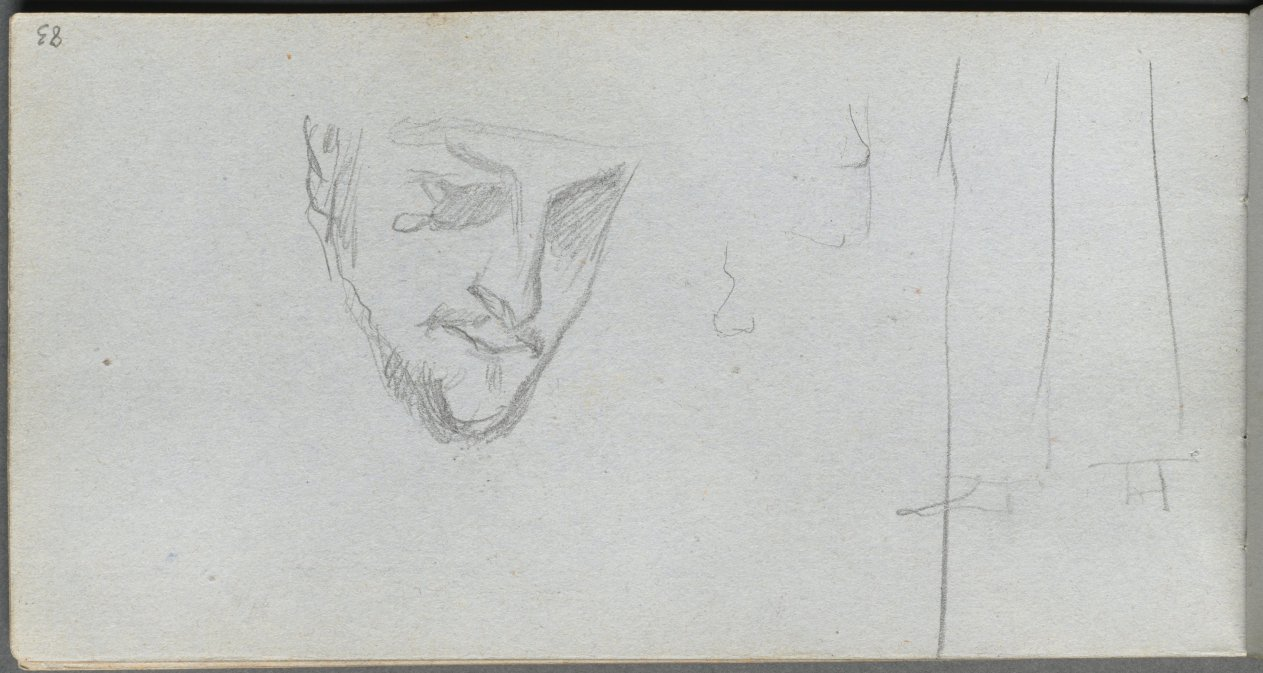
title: Sketchbook, page 83: Study of a Face, Legs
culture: France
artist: Ernest Meissonier (French, 1815–1891)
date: c. 1860s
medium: graphite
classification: Bound Volume